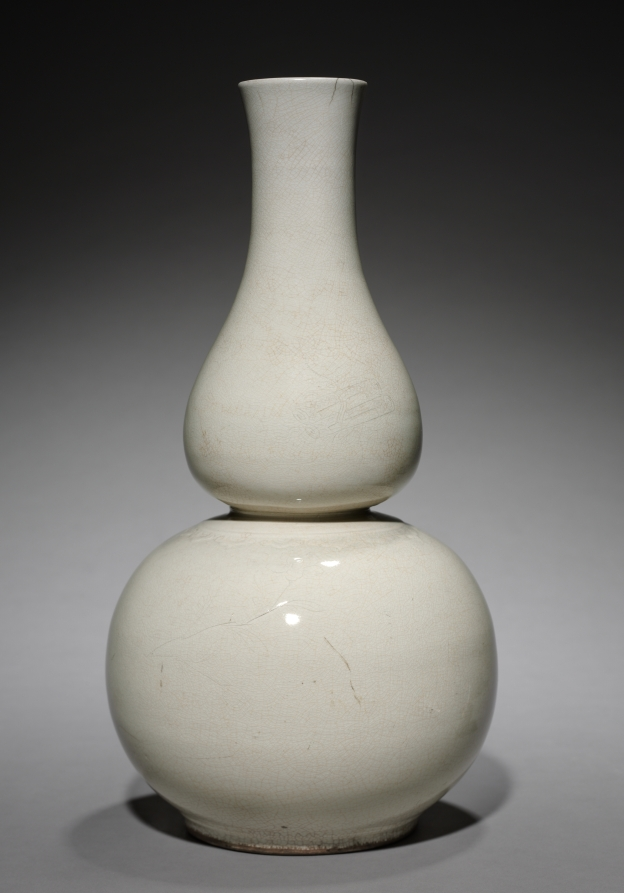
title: Double Gourd-shaped Bottle: Ding ware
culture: China, Ming dynasty (1368–1644)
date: 1368–1644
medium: porcelain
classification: Ceramic